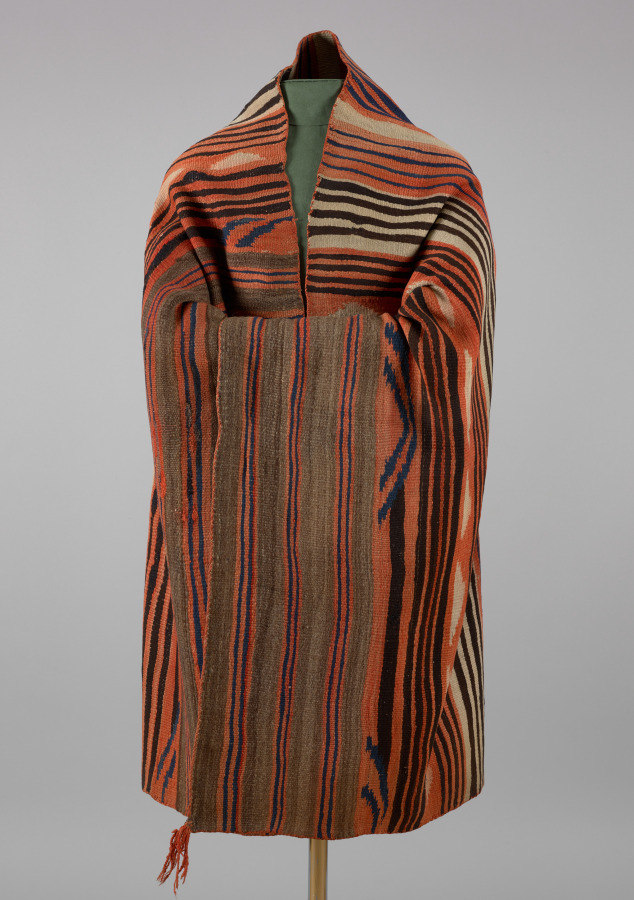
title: Banded Wearing Blanket (Diyugi)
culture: America, Native North American, Southwest, Diné (Navajo) or Zuni Pueblo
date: c. 1880–90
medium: Wool (handspun and bayeta): tapestry weave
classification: Textile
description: This blanket was created during the late 1800s, when weavers in the Southwest began to shift from making garments for Indigenous use, including trade, to additionally create items for non-Native collectors. In this new market, traditional wearing blankets, which were worn around the shoulders, were marketed as rugs.